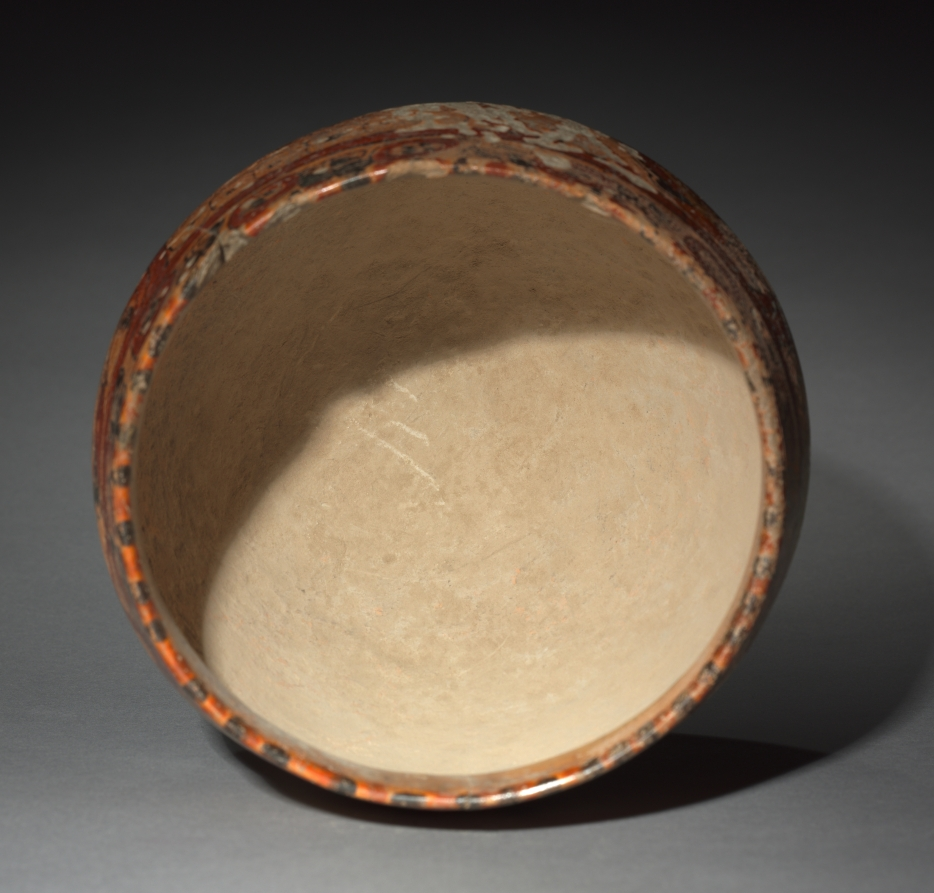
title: Bowl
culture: Mexico or Guatemala, Maya, Late Classic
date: 600–900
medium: pottery with burnished, colored slips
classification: Ceramic